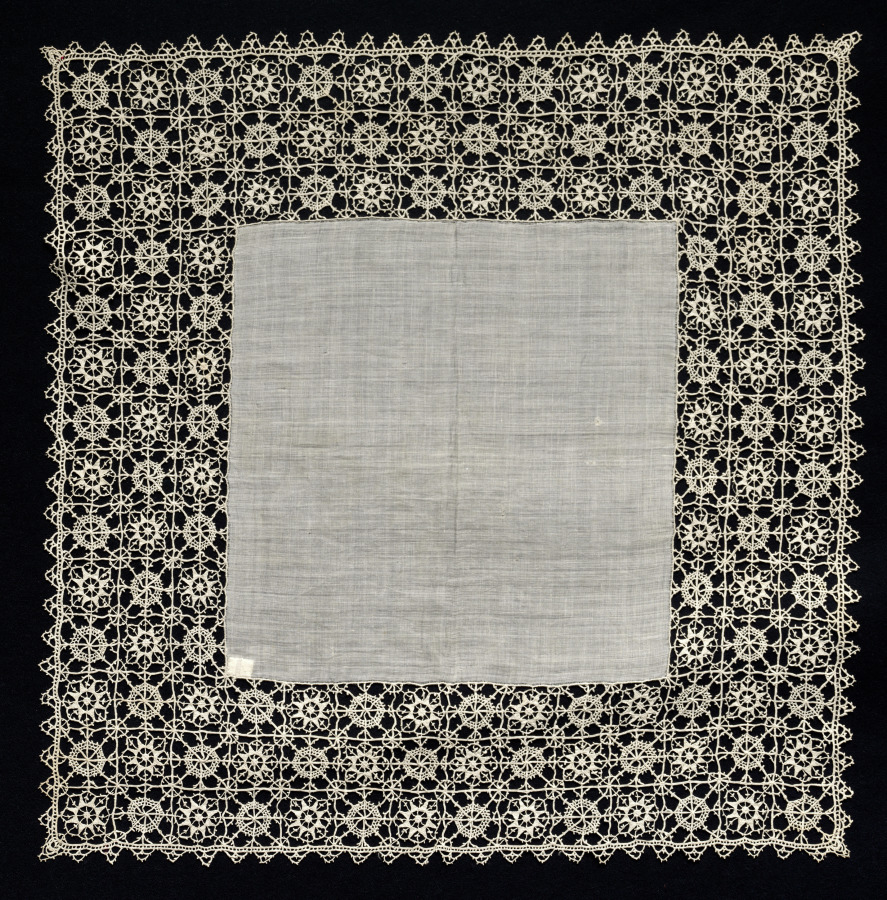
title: Lace Handkerchief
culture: Italy, 1800s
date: 1800s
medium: Plain weave linen (center): needle lace (Reticella) border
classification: Lace